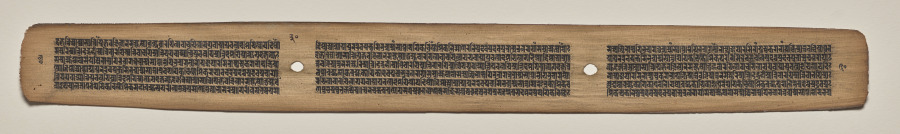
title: Text, Folio 30 (verso), from a Manuscript of the Perfection of Wisdom in Eight Thousand Lines (Ashtasahasrika Prajnaparamita-sutra)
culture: Eastern India, Bihar, Vikramashila Monastery. Painting: Nepal, Kathmandu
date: Sunday, September 14, 1119 (year 239 of the Newar Samvat in the month of Ashvina)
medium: gum tempera and ink on palm leaves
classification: Painting